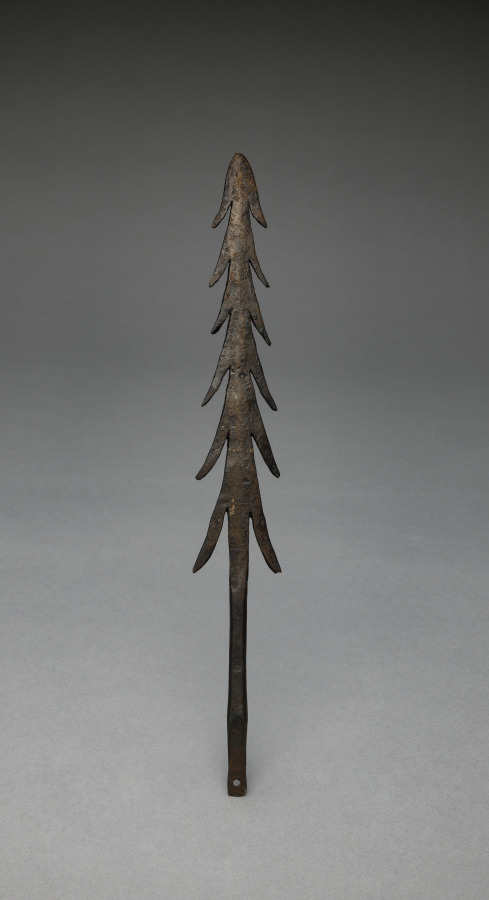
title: Barbed Spear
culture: Philippines, Northern Luzon, Ifugao, likely Lepanto area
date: before 1922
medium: Metal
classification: Arms and Armor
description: This forged iron spearhead features a long central blade and multiple paired barbs tapering in a tree-like silhouette. Its stepped barbed form aligns with spears documented in Eastern Lepanto and Northern Nueva Vizcaya.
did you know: This object most likely originated among the Igorot people, but similar spearheads are documented across the Philippine archipelago.